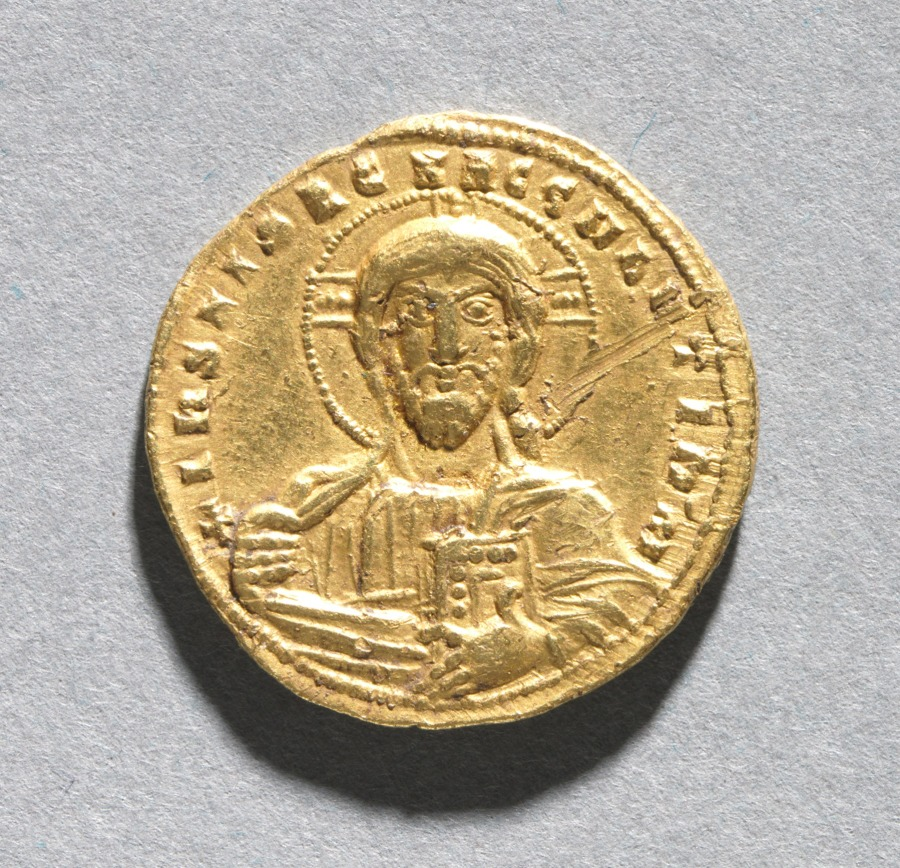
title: Nomisma with Nicephorus II Phocas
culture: Byzantium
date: 963–969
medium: gold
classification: Coins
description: The vast number of surviving Byzantine coins attests to the level of trade across the empire. Controlled and supervised by the emperor, the producers of coins took care to represent his authority and reflect his stature. Talented artists were recruited to engrave the dies (molds) used for the striking of coins. Emperors increasingly came to include their heirs and co-emperors on their coinage, as well as other family members or even earlier rulers. Coins were recognized, then as now, as small, portable works of art. With their inscriptions and images, Byzantine coins provide valuable documentation of historical events and a record of the physical appearance of the emperors. The coins shown here include the solidus, the basic gold coin of 24 karats; the tremissis, a gold coin of one-third the weight and value of the solidus; and the nomisma, which in the 10th century replaced the solidus as the standard gold coin.